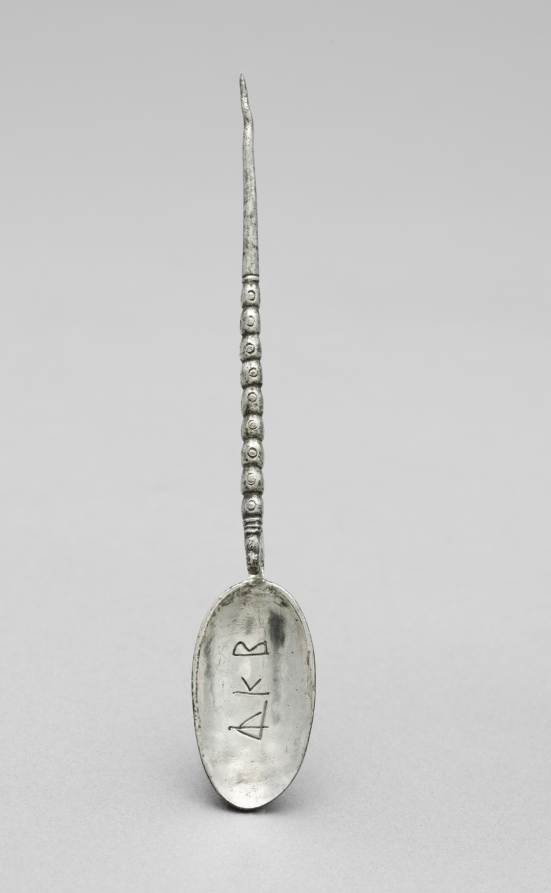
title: Spoon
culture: Byzantium, Syria(?), Byzantine period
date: 300s CE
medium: silver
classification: Metalwork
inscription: Greek inscription the center of the bowl.